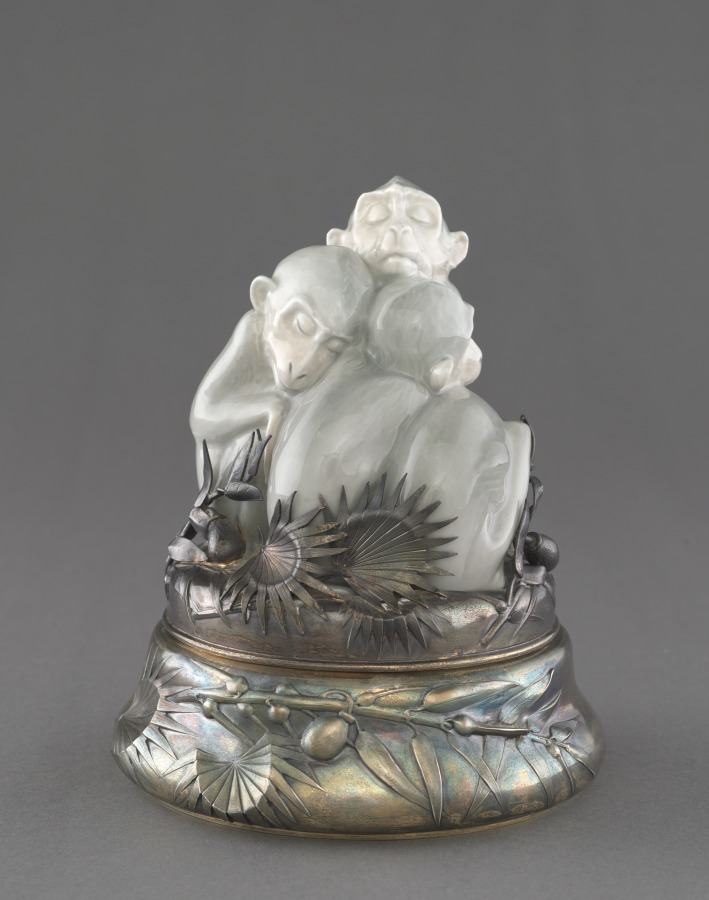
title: Monkey Figure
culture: Denmark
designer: Ingeborg Plockross-Iminger (Danish, 1872–1962)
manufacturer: Bing & Grøndahl (Danish, est. 1853)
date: c. 1900–1925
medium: porcelain, silver-gilt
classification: Sculpture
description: This figure featuring three monkeys was designed by the Danish ceramist Ingeborg Plockross-Iminger. The figure is displayed with a French silver mount that references Japonisme and Art Nouveau styles that were popular at the end of the 1800s and experienced a resurgence in the 1920s because of increased importation of Japanese goods to the West.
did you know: This ceramic figure usually stands alone, without a silver mounting.